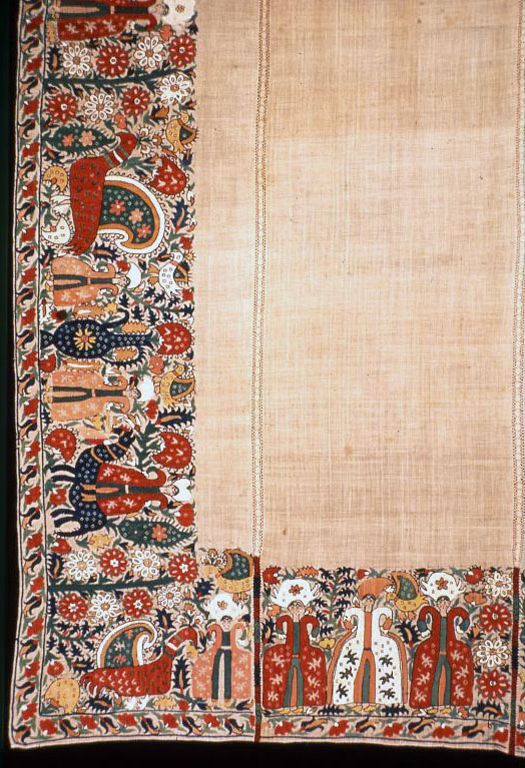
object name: Textile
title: Bedcover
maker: Greece, Epirus Province or Ionian Island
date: 17th century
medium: Linen, plain weave; embroidered with silk and gilt-metal-strip-wrapped silk in chain, crossed back, cross, running (pattern darning), satin and stem stitches; joined by silk, needle-made inserts and linen, bobbin straight lace tape; four loom widths joined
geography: Greece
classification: textile; needlework (visual works)